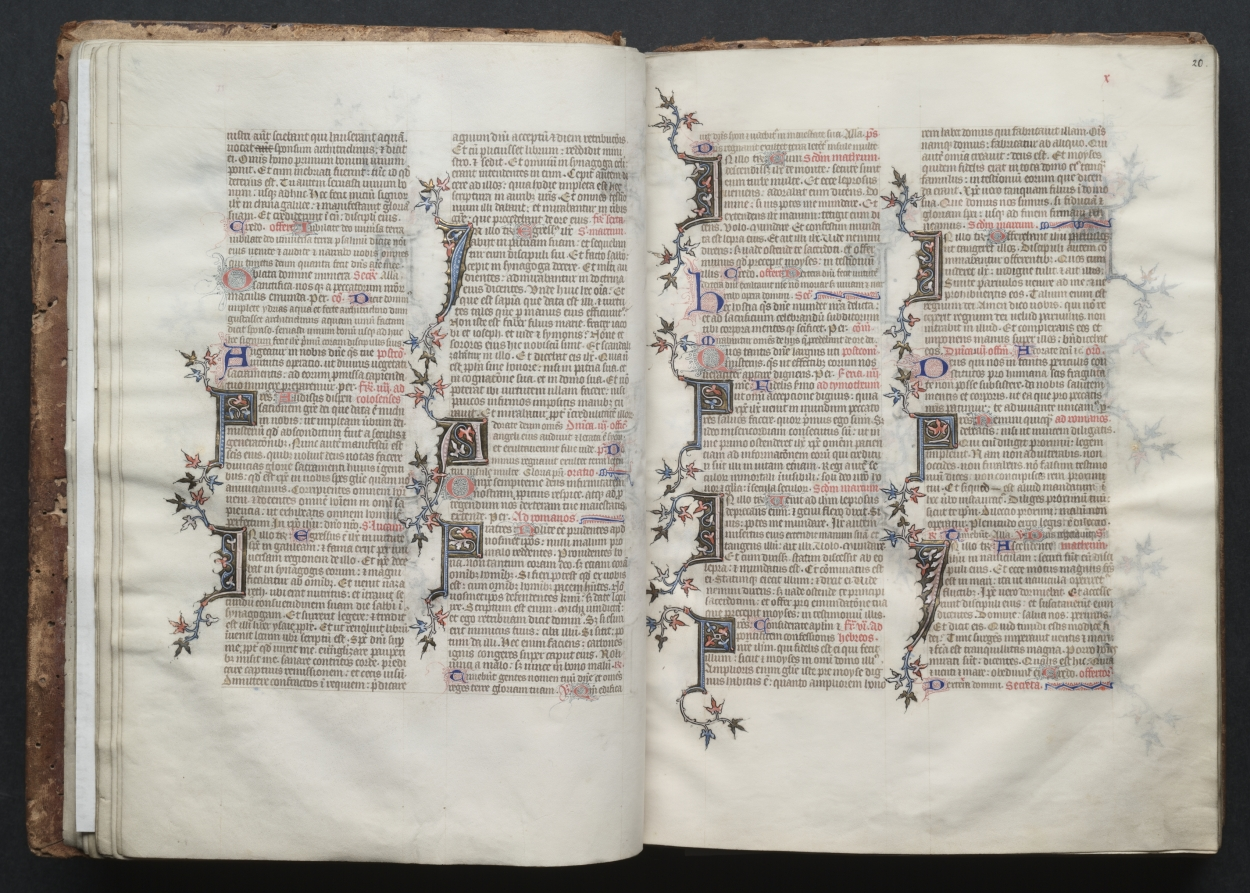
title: The Gotha Missal: Fol. 20r, Text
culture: France, Paris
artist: Master of the Boqueteaux (French)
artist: and Workshop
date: c. 1375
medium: ink, tempera, and gold on vellum; blind-tooled leather binding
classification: Bound Volume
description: The style and quality of this manuscript's decoration is typical of deluxe Parisian books made for aristocratic or royal patrons. Most of the book's decoration appears to be the work of the Master of the Boqueteaux, an artist active at the court of King Charles V (died 1380). His style was apparently shared by a number of book illuminators working in and around Paris. It is very possible that the Gotha Missal belonged to Charles V, but is not provable because the manuscript has no royal portraits and lacks a colophon. Given the book's magnificent decoration, however, it would seem that it was produced for a Valois prince, if not for the king himself. The manuscript receives its name from the German dukes of Gotha, its later owners.